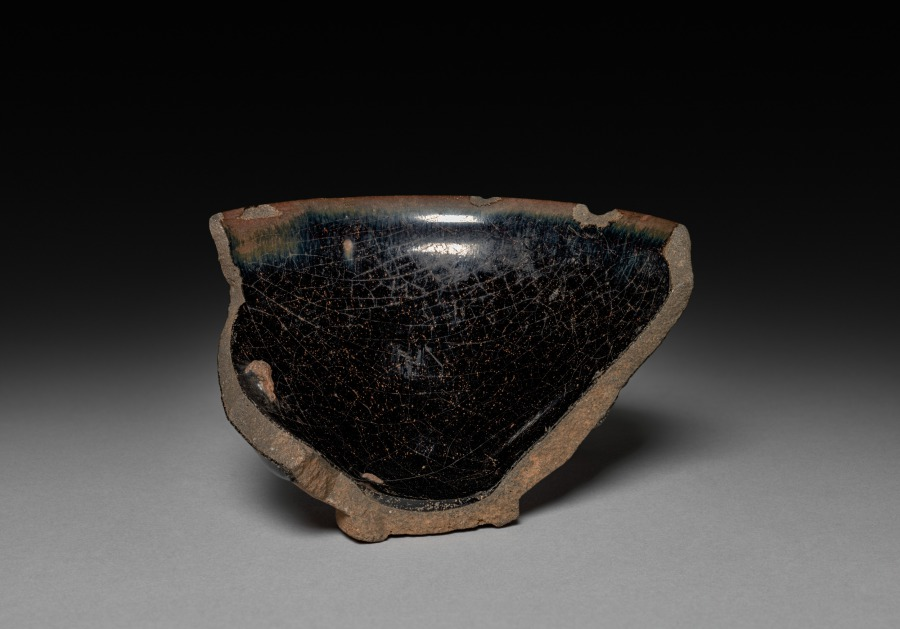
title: Shard of Tea Bowl: Jian ware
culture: China, near Shui ch'i, Song dynasty (960-1279)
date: 960–1279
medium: stoneware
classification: Ceramic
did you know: Jian ware was made of a very hard, coarse grain.